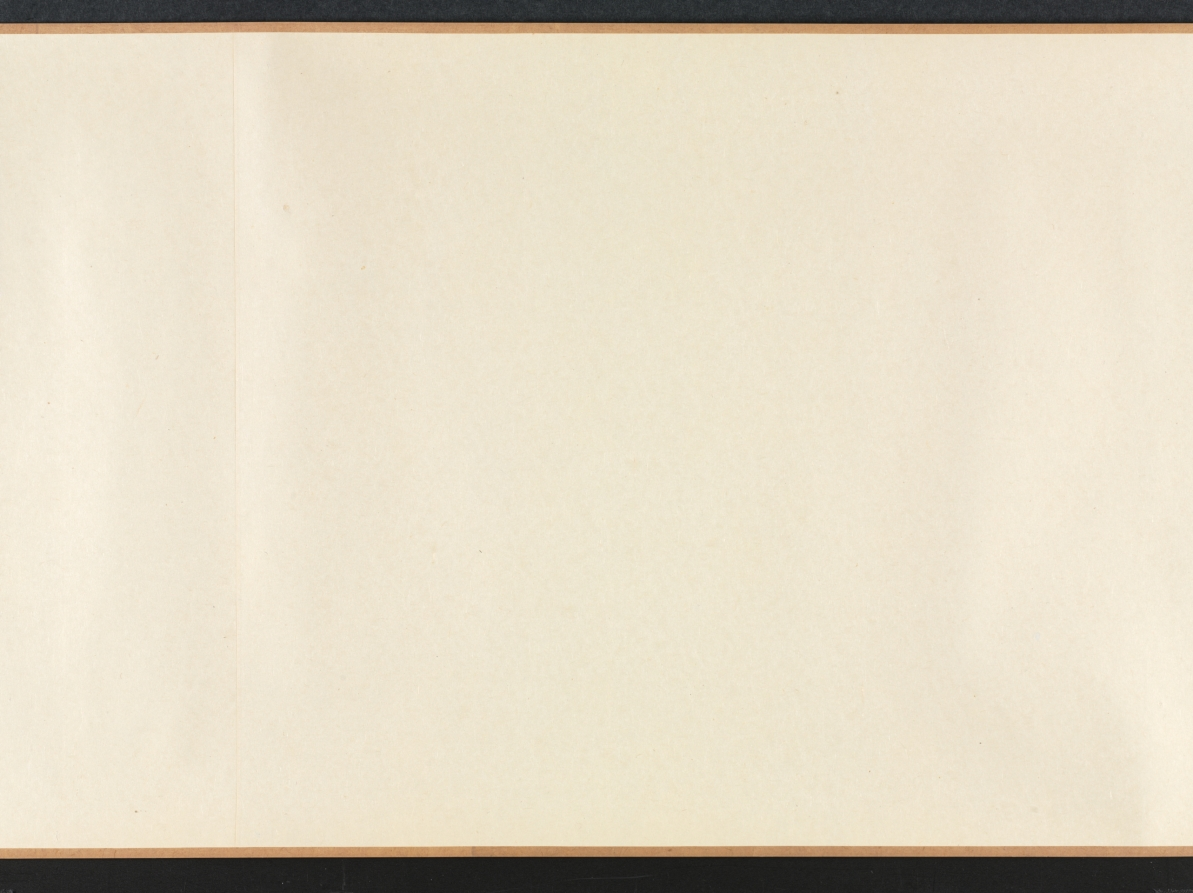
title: Hall of Lofty Pines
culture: China, Qing dynasty (1644-1911)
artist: Wang Hui (Chinese, 1632–1717)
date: 1703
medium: handscroll; ink and color on paper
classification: Painting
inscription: [題] 松喬堂圖 康熙癸未夏六月, 海虞耕煙散人王翬畫。[印]王翬之印; 石谷. [左下] 來青閣; 耕煙野老時年七十有二.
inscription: 松喬堂圖一卷，海虞石谷王君為靜海近公厲少司冦公作也。圖成于癸未之夏。未幾而公遂仙去。公令子今編修君南湖屬余題跋其後。余與公同官侍從，交契最深。側見公之清修純德，蔚為聖天子所眷重。侍直內廷，密勿贊襄，幾二十餘年。蒼生之所以受賜，士林之所以沐德者，天下莫能窺，在廷莫能悉。而公卒不言。以故宸衷日益契，恩禮亦日益渥。雖年逾懸車，時有歸老之念。而上固不聼公之去。其所謂松喬堂者，御書以賜公者也。蓋以松比公之清風勁節，而歲寒不改，經霜彌茂。則又以期公之壽考未有艾焉。公知此身未易乞，而山林槃磵之樂，止可寄諸寤思。此松喬堂圖之所由作也歟。石谷此圖，結構精密，筆墨超邁。其寫樹木之蒼蔚，堂宇之靚幽。恍見摩詰輞川樂天廬山之勝。獨惜公未得一日徜徉故園以償其願。即繪於圖亦未得以永其趣，此編修君之所以眷眷不忘也。雖然千歳之松喬，下蔭百畝，上以修棟梁之需。然則上當日名堂之意，不更望於後之人襲其芘而養其材也哉。吾願編修君之寶斯圖。并望君之塗塈丹雘，大其堂構也已矣。 康熈丙戍重陽三日，雲間王鴻緒跋。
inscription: 10 additional seals: 1 seal of Li Duna 勵杜納 (1628–1703); 4 seals of Zha Ying 查瑩 (jinshi of 1766); 5 seals of Li Yun (dates unknown).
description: Wang Hui 王翬, a leading painter in the orthodox school of the early Qing dynasty (1644–1911), was commissioned to paint this landscape with a country estate for Li Duna 勵杜納 (1628–1703), vice minister of justice in Emperor Kangxi’s court. The emperor had honored Li by granting him a piece of calligraphy with the name of Li’s retirement retreat, “Hall of Lofty Pines.” He drew a comparison between pines and Li’s upright character, resilience, and longevity. Wang Hui’s painting was supposed to allow Li to imagine living in a beautiful, secluded compound among the hills and pines. Sadly, Li died before seeing the completed painting and before receiving the emperor’s permission to retire. The landscape begins with peaceful riverbanks and low hills. The pines around the estate in the middle of the handscroll are truly lofty, some stretching even beyond the frame of the painting. Li Duna, the estate’s owner, is shown twice in his serene mountain retreat: first approaching the entrance to the compound with two servants at the right, and then later in the scroll, to the left, reading in the comfort of an inner room.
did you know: One servant carries the estate owner's carefully wrapped qin, a type of zither.